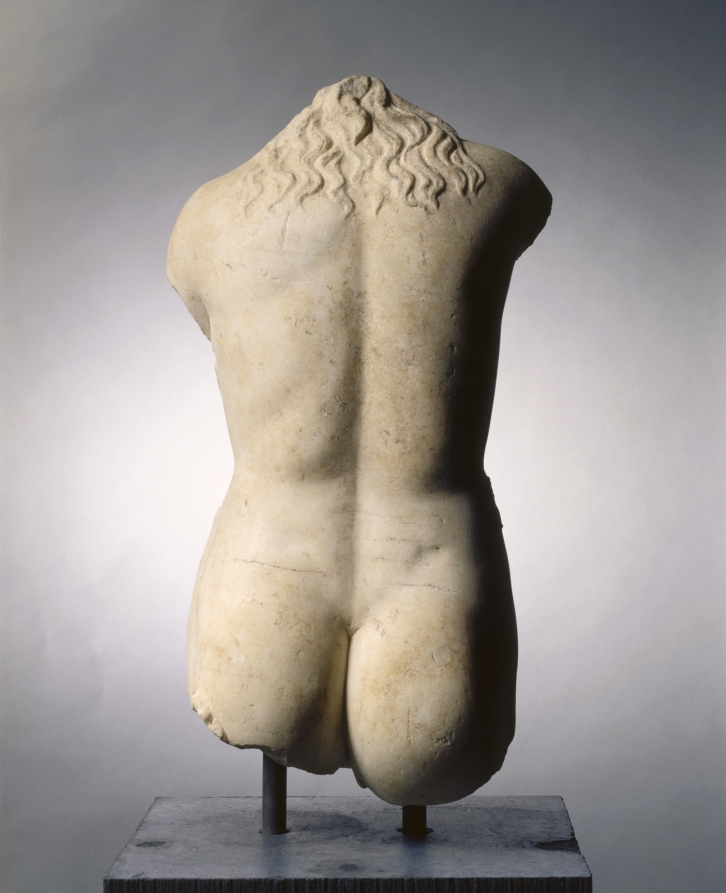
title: Aphrodite Torso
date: 200–1 BCE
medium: Thasian marble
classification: Sculpture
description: This torso can be identified through its nudity and pose as the Greek goddess of love, Aphrodite. Based on the now-lost Aphrodite of Knidos, a revolutionary marble sculpture created by Praxiteles of Athens in the mid-300s BCE, this sculpture belongs to a popular Greek and Roman type showing the goddess at her bath. With hips slightly shifted, she stood in a relaxed posture with most of her weight on one leg, probably with one hand modestly covering her pubic region and the other shielding her breasts or holding drapery. Alternatively, one or both hands may have tended to her wet hair, some of which falls over her neck and upper back.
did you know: This torso is based on the Aphrodite of Knidos, a Greek original by the master sculptor Praxiteles.